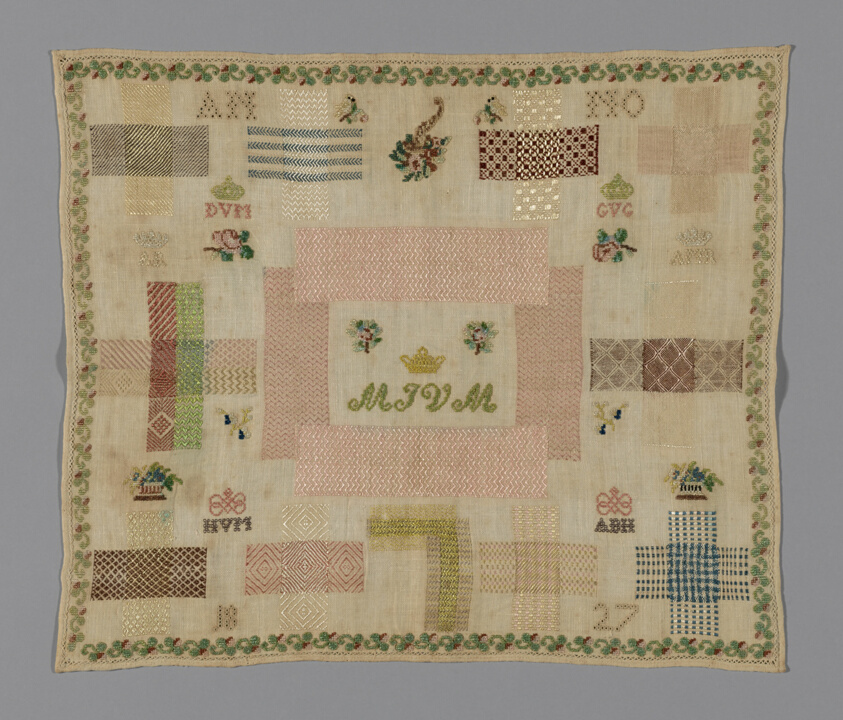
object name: Textile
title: Darning Sampler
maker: Germany or Netherlands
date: 1827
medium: Linen, plain weave; embroidered in cross and darning stitches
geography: Germany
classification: textile; needlework (visual works); sampler